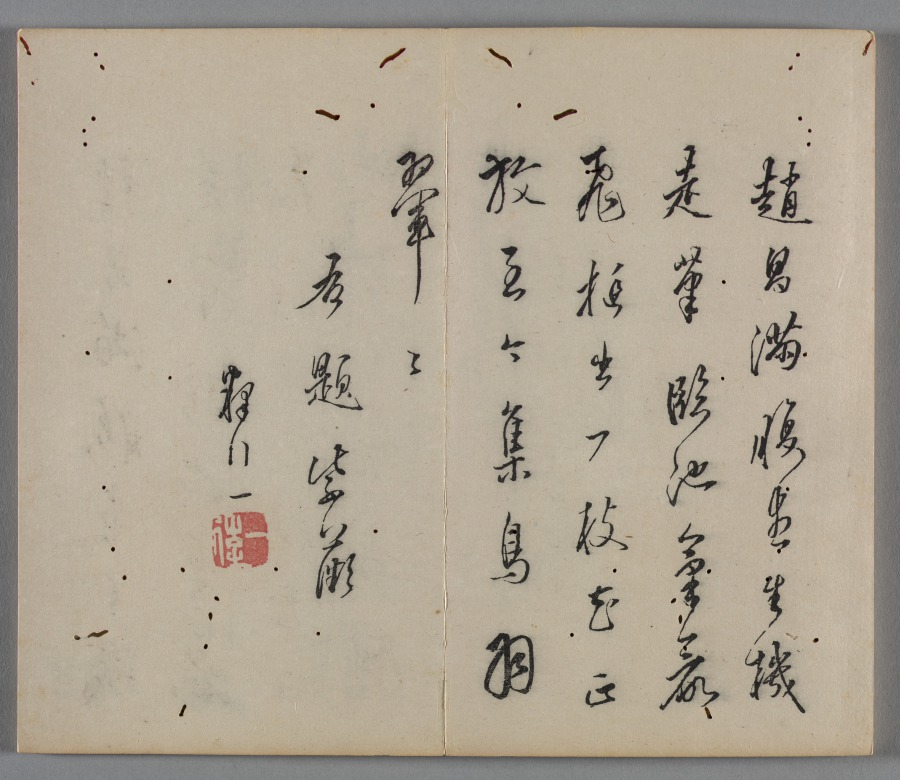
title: Ten Bamboo Studio Painting and Calligraphy Handbook (Shizhuzhai shuhua pu): Birds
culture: China, Qing dynasty (1644-1911)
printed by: Hu Zhengyan (Chinese, c. 1584–1674)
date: 1633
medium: Woodblock-printed book; ink and colors on paper; first edition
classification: Print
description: Color printing reached a level of perfection in the early 1600s, as seen in this Ten Bamboo Studio Collection of Calligraphy and Painting and the Mustard Seed Garden Manual of Painting (printed 1679 and 1701). The painterly quality, precision in registering (aligning) the woodblocks, and harmonious colors made them the most successful color print editions in Chinese history. Both editions were printed and compiled in Nanjing, spread nationwide, and had a great impact on the arts in Japan and Korea.